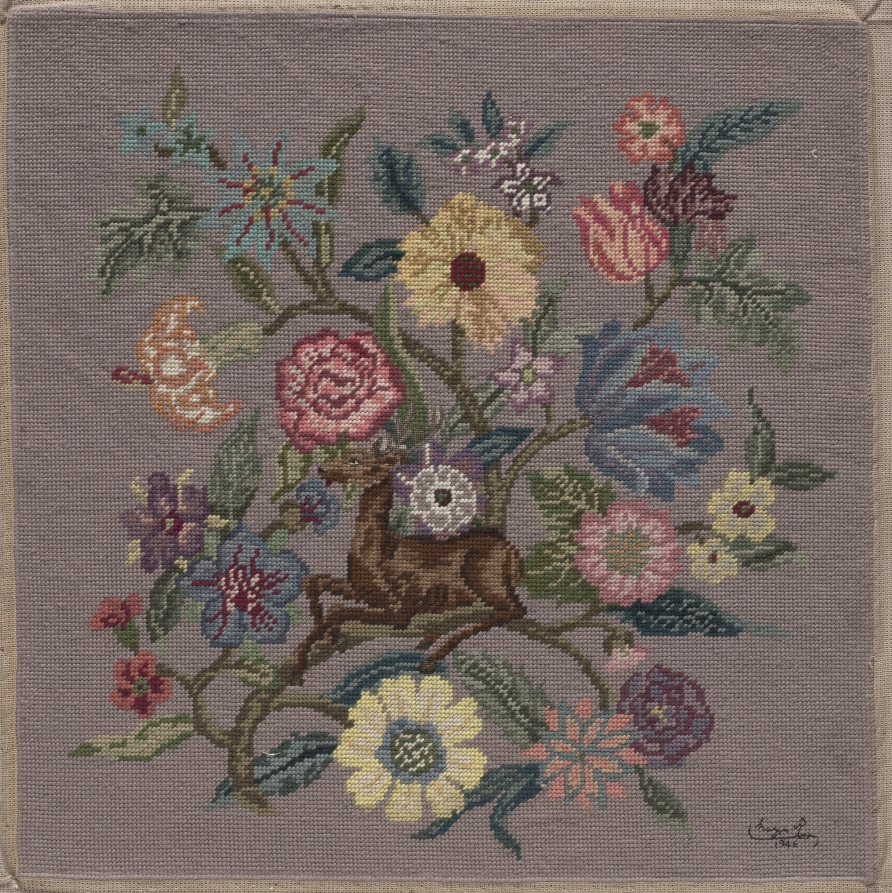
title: Embroidered Floral Panel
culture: England, 20th century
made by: Queen Mary (British, 1867–1953)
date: 1946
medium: embroidery; wool on cotton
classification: Embroidery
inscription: signed lower right: "Mary R 1946."